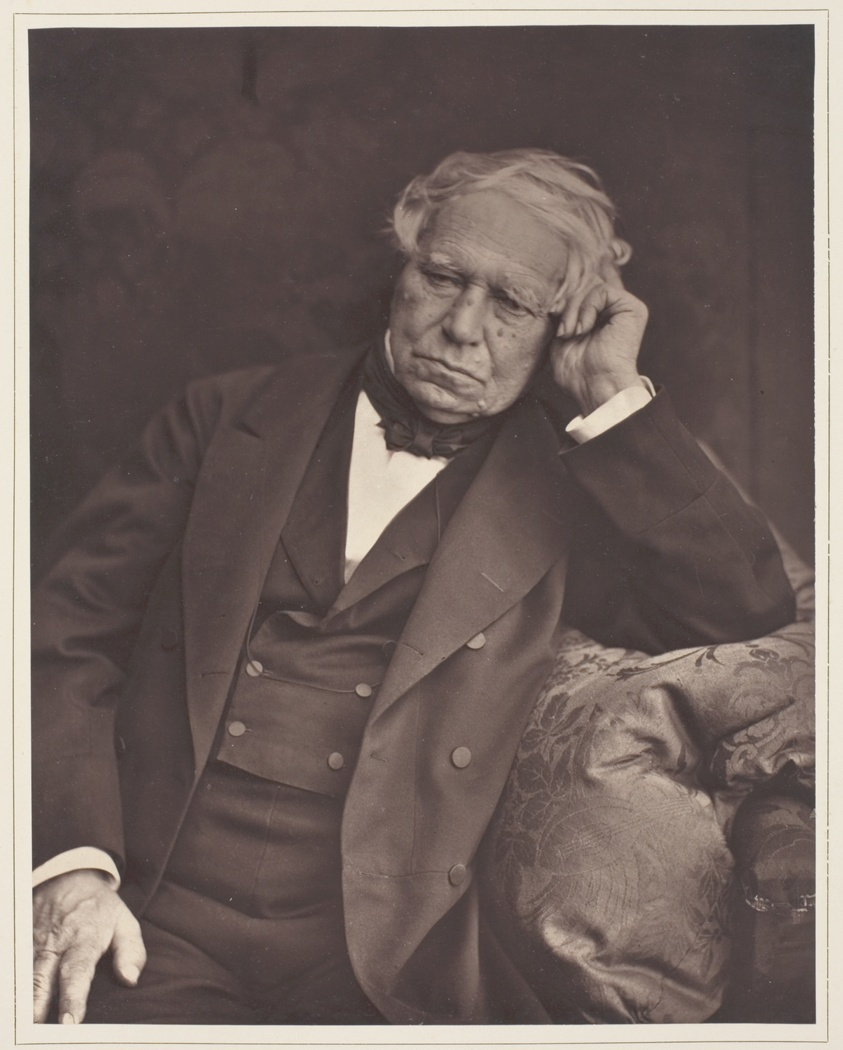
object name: Photograph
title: Dufaure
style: 19th century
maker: Antoine Samuel Adam-Salomon (French, 1811–1881)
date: 1876/84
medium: Woodburytype, from the periodical “Galerie Contemporaine Littéraire, Artistique” (1878), volume 6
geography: France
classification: woodburytype; photomechanical process; photography; photograph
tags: Collected by Hugh Edwards, Contemporaine Littéraire